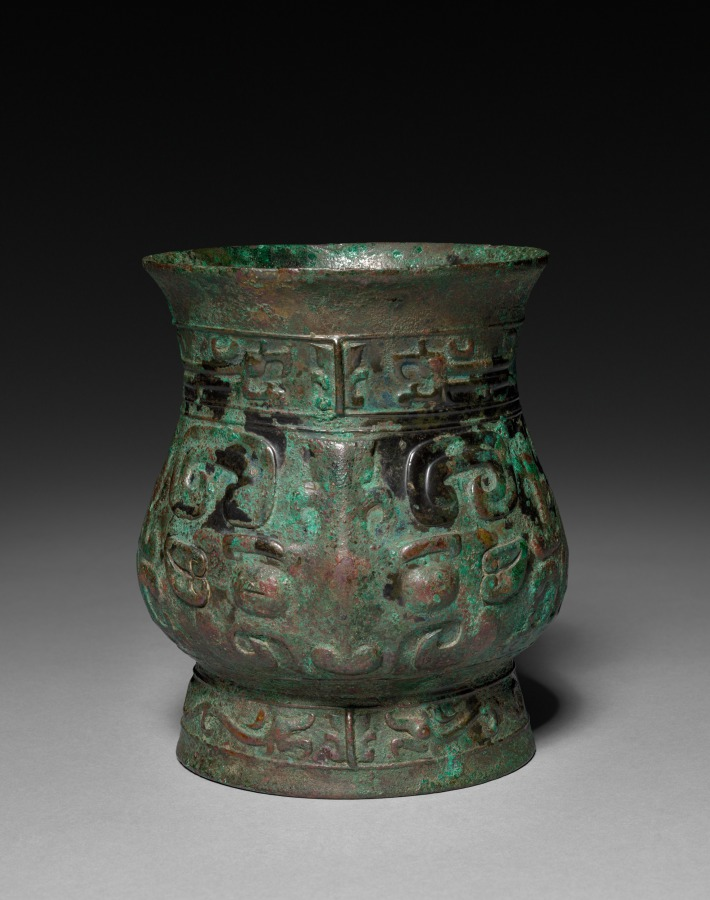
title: Zun: Ceremonial Vessel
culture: China, Zhou dynasty (c. 1046–256 BCE)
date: c. 1023–900 BCE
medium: bronze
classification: Metalwork